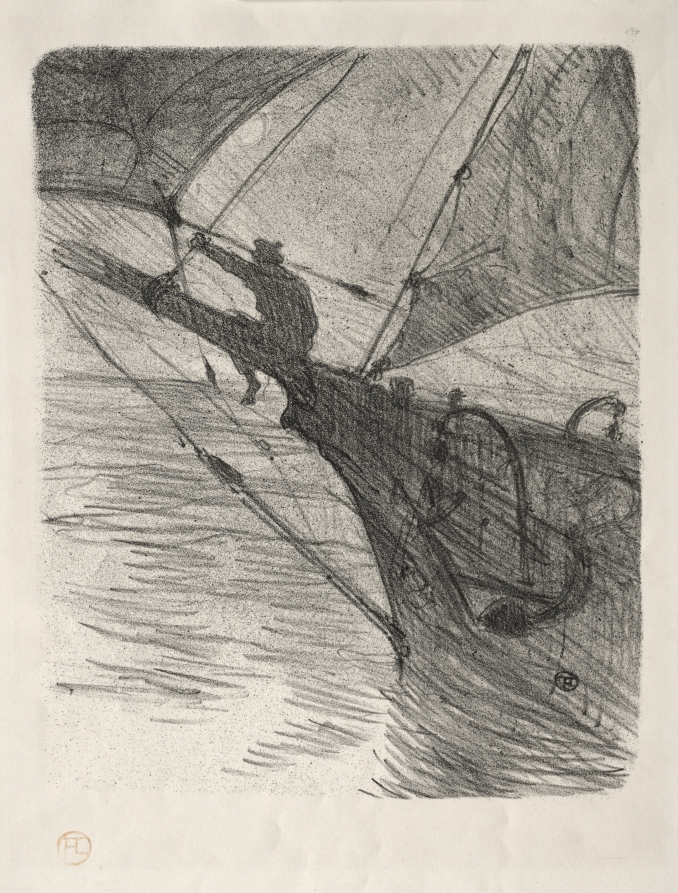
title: Oceano Nox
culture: France, 19th century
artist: Henri de Toulouse-Lautrec (French, 1864–1901)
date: 1895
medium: lithograph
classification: Print